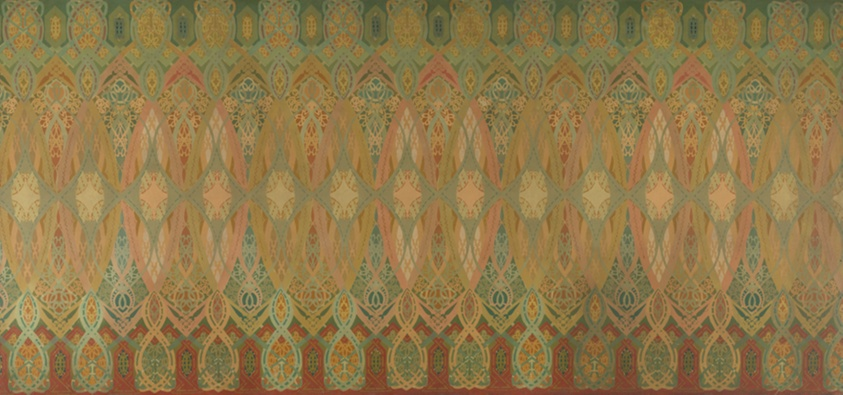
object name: Architectural fragment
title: Chicago Stock Exchange Trading Room: Stencil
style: Prairie School, 19th century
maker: Adler & Sullivan (American, 1883-1896); Louis H. Sullivan (American, 1856-1924); Executed by Healy and Millet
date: 1893/94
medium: Oil on canvas, mounted on panel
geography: United States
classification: architecture; architectural fragment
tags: Chicago, design, architecture, stencil